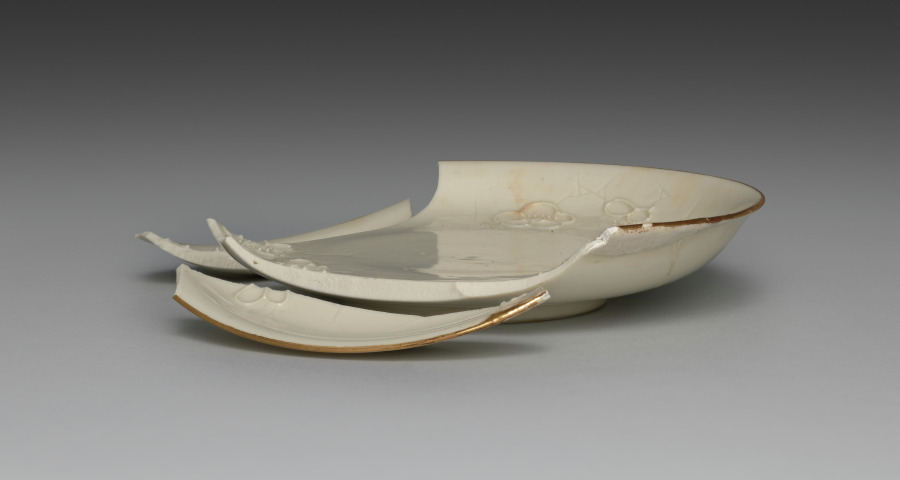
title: Medium-sized Dish from Dining Set with Plum Blossoms and Cracked-Ice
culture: Japan, Meiji period (1868–1912)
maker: Seifū Yohei II (Japanese, 1844–1878)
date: c. 1875–78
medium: Porcelain with molded designs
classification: Ceramic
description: Each item in this set has a delicate low-relief design of flowering plum branches over scattered, intersecting lines meant to resemble the cracked-ice surface of a frozen body of water and is signed on the base in gold pigment. While Yohei II produced many fine works in underglaze blue, like those produced by Kiyomizu Shichibei, he also made works in quite different styles later in his career, from the early 1870 s. In 1873, he was appointed purveyor to the Industrial Center of Kyoto Prefecture, a designation associated with Kyoto’s efforts to reach an international market through the port of Kobe; and from 1875 until his death, he was involved in national-level projects to present Japanese ceramics across the world. It was during this period that Yohei III was apprenticed to Yohei II, and it has been suggested that this set may in fact be an early example of Yohei III’s work, which he signed with his teacher’s name. Decorated with flowers resembling Japanese textile motifs, the set calls to mind the design of Yohei II’s pair of vases with plum blossoms in the Victoria and Albert Museum. Here, the elaborate trees created for a formal public exhibition setting have been translated into the approachable blossoms of the genteel domestic environment. While the designs are consistent across the pieces, each raised flower petal and pistil and each incised line in the ice was done by hand, so the cups, bowls, and dishes are similar yet unique. The bottoms of two boxes once identified the set’s owner, but the information has been deliberately obscured with black ink. However, inscriptions still visible appear to indicate two occasions, once at the end of July 1886 , and once again in June 1916 , when parts of the set were requested from Hokura in Niigata Prefecture. The location corresponds to a neighborhood in the present-day city of Jōetsu. The surname Tsuji 辻 also appears on a paper tag affixed to one of the box cloths. Future research may possibly reveal more about their provenance. A vase by Yohei III in a private collection combines the formal grandeur of the Yohei II vases in the Victoria and Albert Museum with the gentler design of this dining set, placing flowering plum trees against soft, scalloped-edge clouds resembling those in golden screens.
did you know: The dining wares have a creamy white coloration that the four boxes containing them identify as Korean in style.